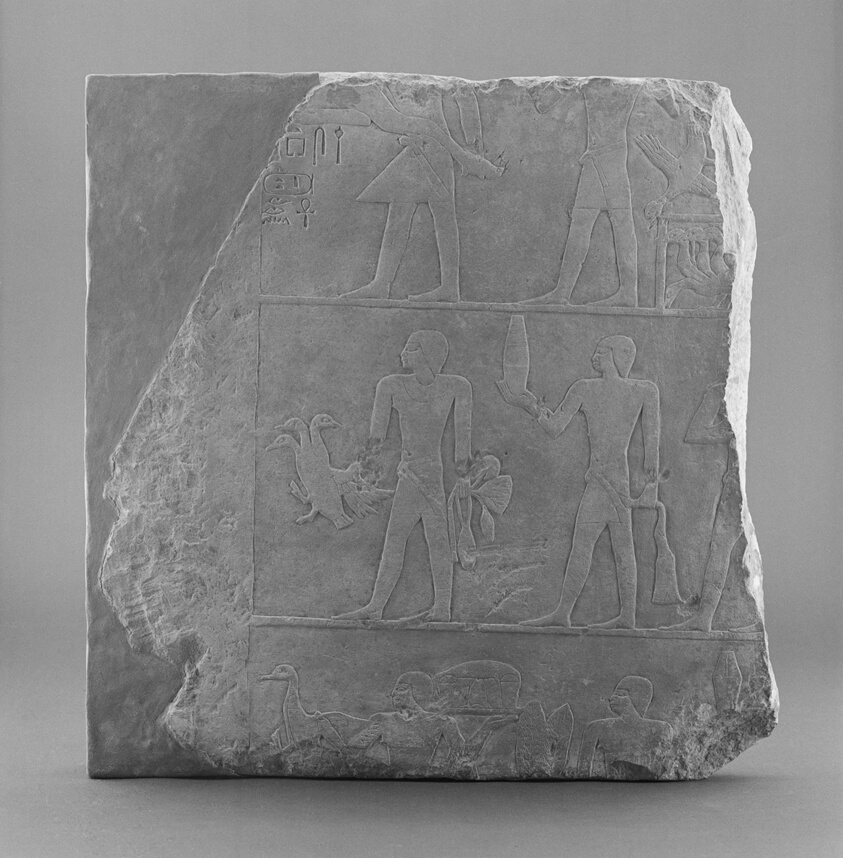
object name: Architectural fragment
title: Wall Fragment from a Tomb Depicting Offering Bearers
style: egyptian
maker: Egyptian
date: Old Kingdom, Dynasty 6 (about 2400–2250 BCE)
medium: Limestone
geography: Egypt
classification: architectural fragment; stone; sculpture; ancient art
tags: offering